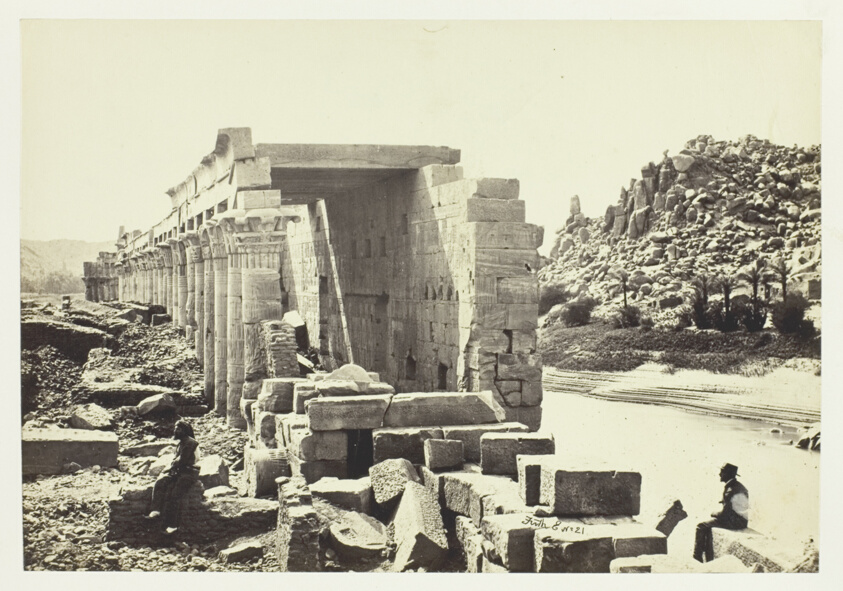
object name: Photograph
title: The Colonnade, Island of Philæ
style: 19th century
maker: Francis Frith (English, 1822–1898)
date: 1857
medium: Albumen print, pl. 15 from the album "Egypt and Palestine, Volume II" (1858/60)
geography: England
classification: albumen silver print; photographic process; photography; photograph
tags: Collected by Hugh Edwards, Egypt and Palestine